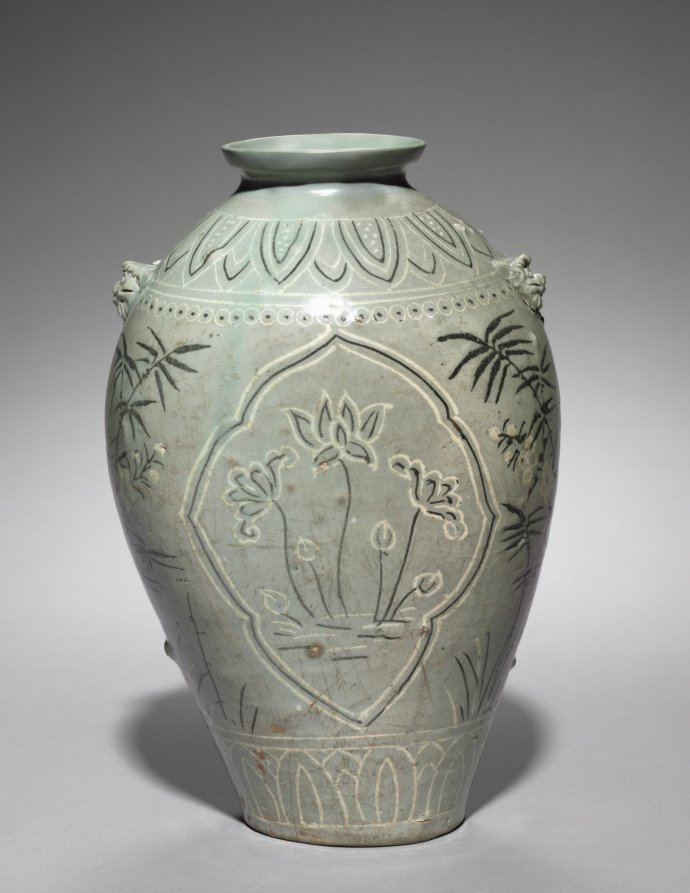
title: Vase with Inlaid Lotus, Plum, and Bamboo Design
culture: Korea, Goryeo dynasty (918–1392)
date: 1300s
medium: celadon with inlaid design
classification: Ceramic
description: Flattened-shaped jars like this one started to appear around the late 1200s. Each of the flattened sides is decorated with an image of a lotus flower pond, enclosed in a lobed panel. The protruding sides, on the other hand, depict an image of bamboo trees and plum blossoms. This particular example seems to have been produced in the late 1300s, when the overall quality of techniques involved in making celadon works sharply deteriorated. In contrast to translucent greenish blue celadon works of the 1100s, this flask has a gray greenish glaze due to less refined clay. Furthermore, its rather roughly executed inlaid design shows a clear sign of decline in craftsmanship. Nevertheless, less attention to technical details gave way to a freer style pottery called buncheong in the succeeding centuries.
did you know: The decor that adorns this flask was done in the inlay technique, a method that fills engraved designs with either white or black soil.